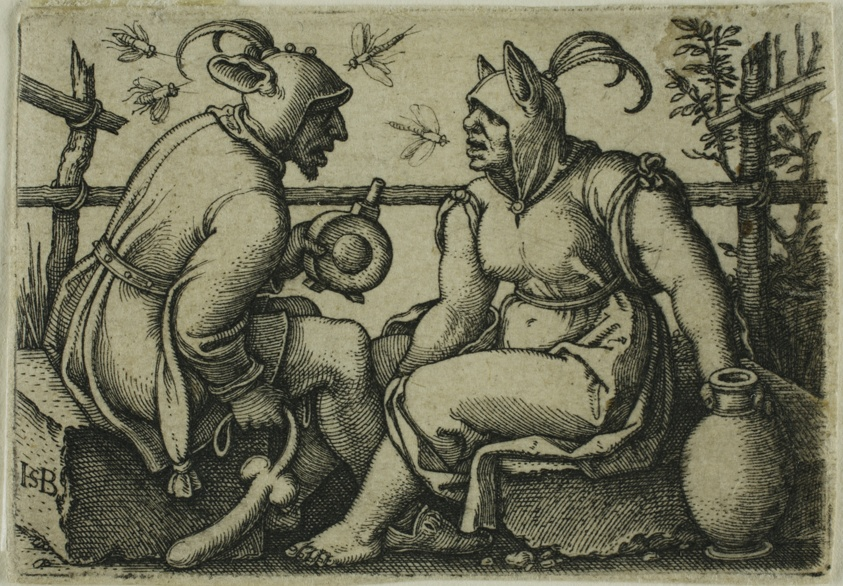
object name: Print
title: The Fool and the Foolish Woman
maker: Sebald Beham; German, 1500-1550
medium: Engraving in black on ivory laid paper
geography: Germany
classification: engraving; print; prints and drawing